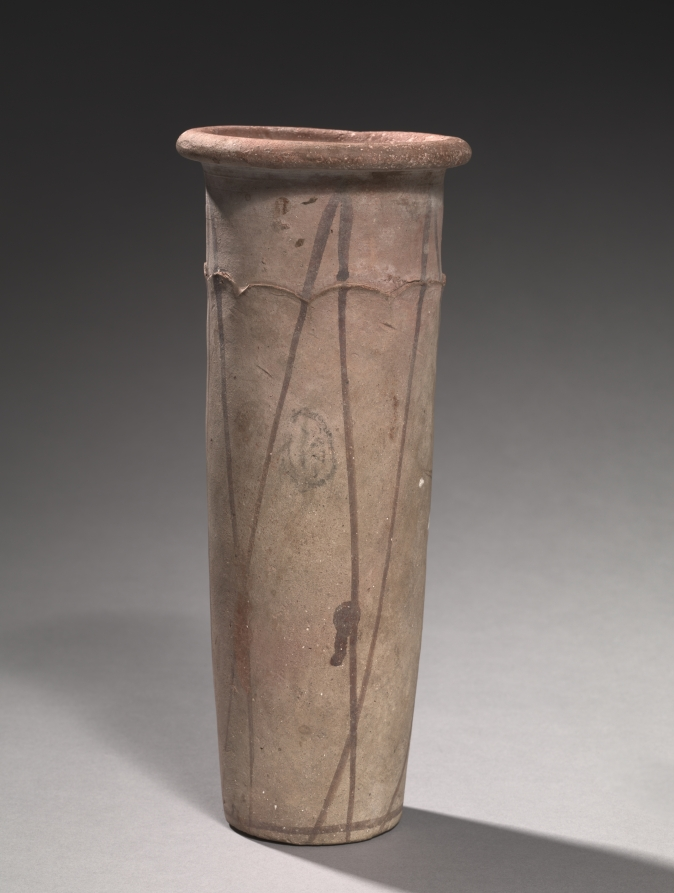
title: Wavy-Handled Jar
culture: Egypt, Predynastic (5000–2950 BCE), Naqada IIa (3650–3300 BCE) or later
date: 4000–3000 BCE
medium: marl clay ware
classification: Vessels